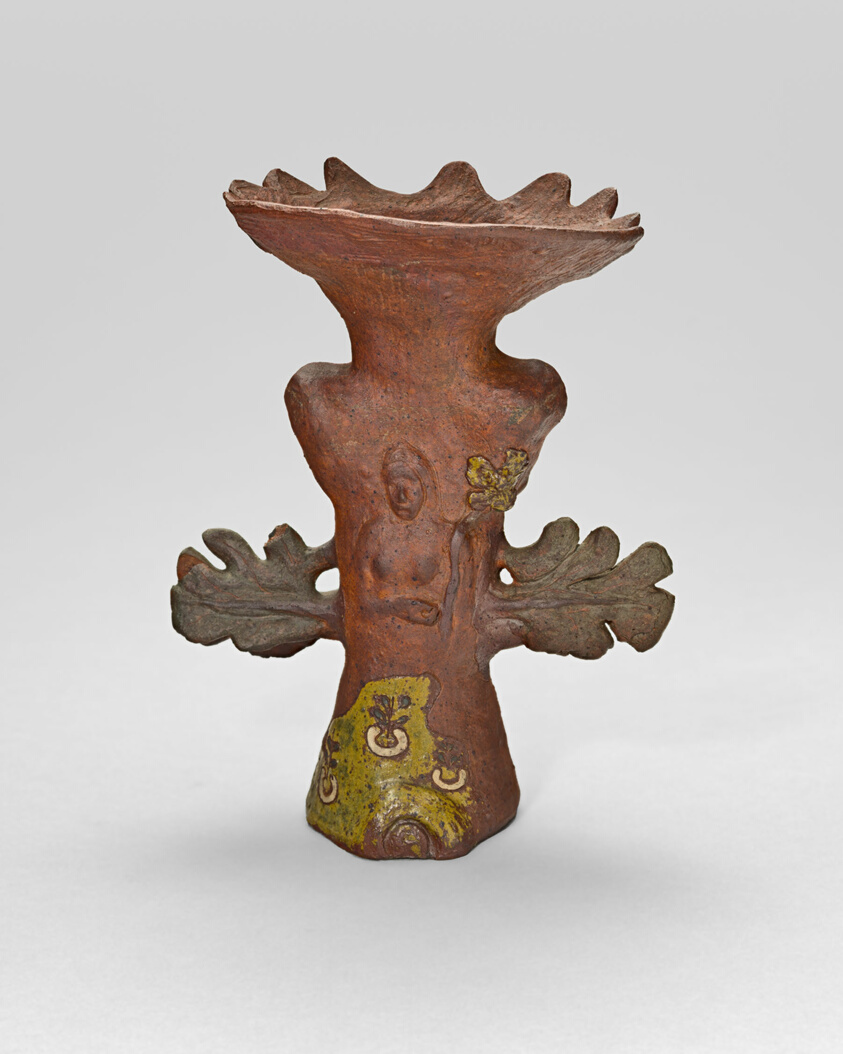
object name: Sculpture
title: Vase in the Form of a Tropical Plant with Bird and Deity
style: Post-Impressionism, 19th century, nineteenth century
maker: Paul Gauguin (French, 1848–1903)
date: 1887/88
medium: Stoneware painted with slip and gold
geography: France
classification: vase; sculpture; french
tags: vase, bird, diety, gods (deities), plants, sculpture